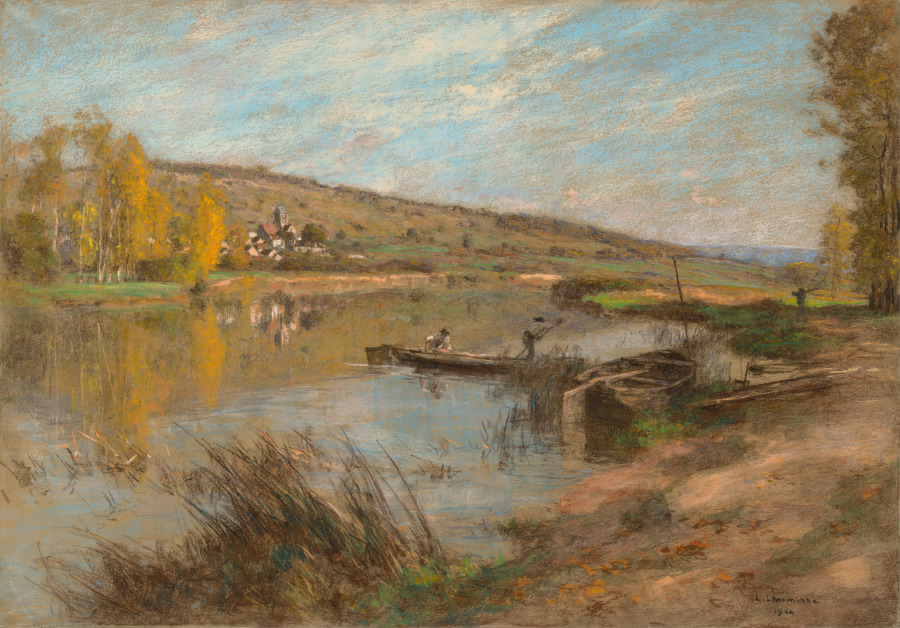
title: Quai au Sable, Chartèves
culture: France, 20th century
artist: Léon Augustin Lhermitte (French, 1844–1925)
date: 1904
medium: pastel on gray wove paper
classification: Drawing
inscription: inscribed, lower right, in black pastel: L. Lhermitte / 1904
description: Like many of Léon-Augustin Lhermitte’s pastels, this drawing shows the Marne River in northeastern France. Such artworks were created both because of the artist’s attraction to the subject and due to their marketability. Drawing from memory, Lhermitte worked in his studio, producing a complex range of marks with pastel crayon on densely textured paper and even manipulating the powdery material with brushes and sponges. Although his comparatively traditional style did not align with artistic movements of his time, it was hugely popular around 1900—especially in the United States, where the hardworking laborers that populated his landscapes appealed to industrialist collectors.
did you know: Lhermitte received a stipend from his hometown Mont-Saint-Père to study in Paris.